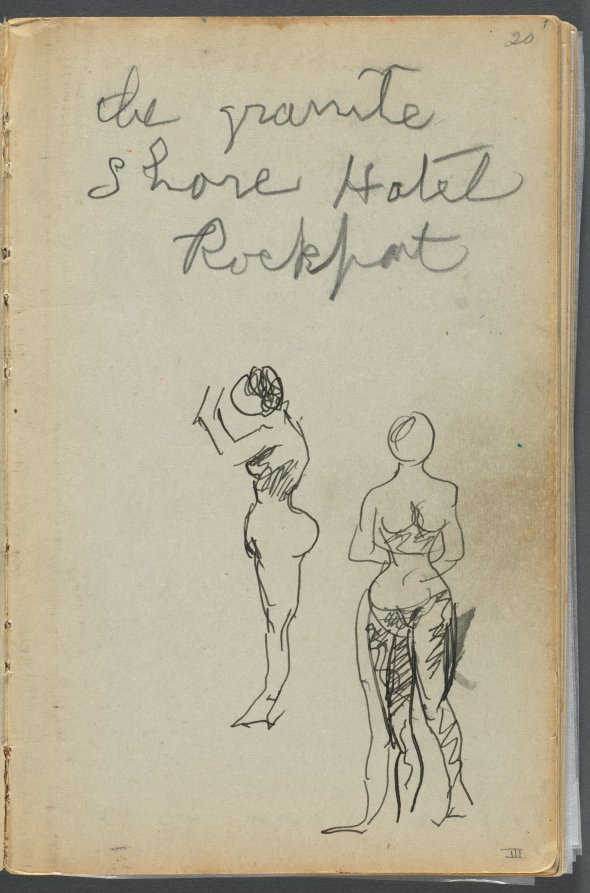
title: Sketchbook- The Granite Shore Hotel, Rockport, page 001: Female Nudes with Notes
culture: America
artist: Maurice Prendergast (American, born Newfoundland [now Canada], 1858–1924)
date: 1905–10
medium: graphite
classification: Bound Volume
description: This sketchbook contains 72 pages of pencil drawings and 9 watercolors of Cape Ann. On the inside of the cover Prendergast wrote the address of the Granite Shore Hotel in Rockport, Massachusetts.